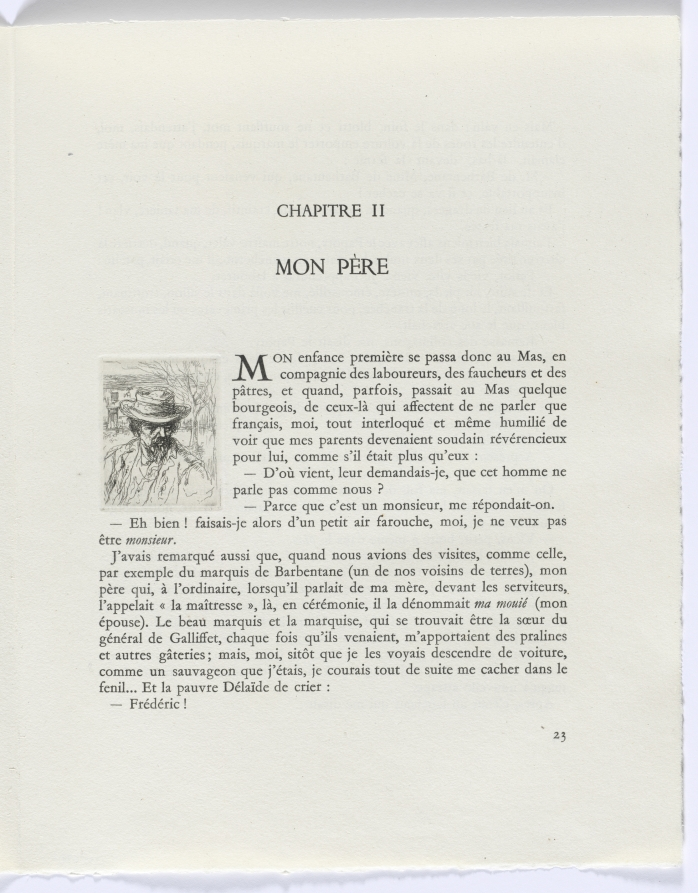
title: Frédéric Mistral: Mémoires et Recits by Frédéric Mistral: bust of man with hat (page 23)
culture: France, 20th century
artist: Auguste Brouet (French, 1872–1941)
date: 1937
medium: etchings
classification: Portfolio